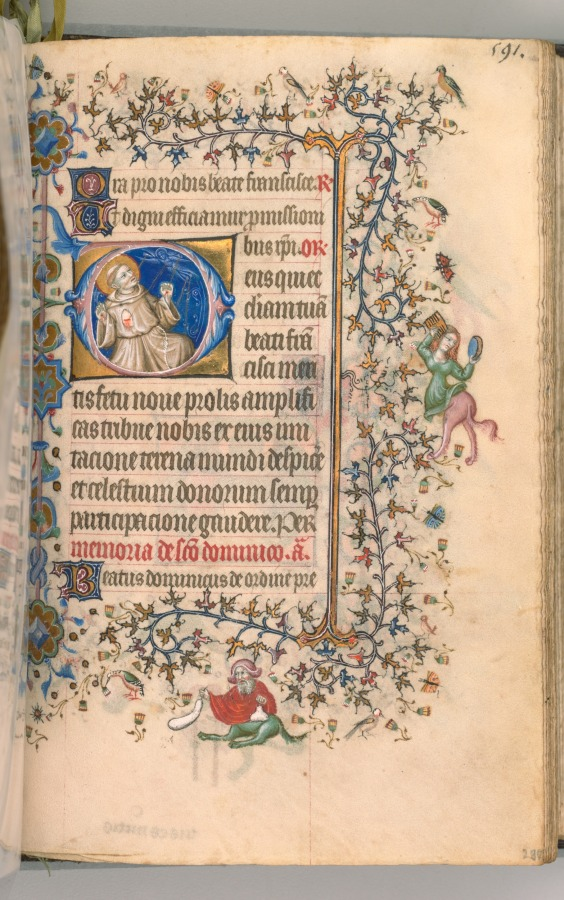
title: Hours of Charles the Noble, King of Navarre (1361-1425): fol. 290r, St. Francis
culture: France, Paris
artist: Master of the Brussels Initials and Associates (French)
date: c. 1405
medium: ink, tempera, and gold on vellum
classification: Bound Volume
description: This precious volume was obviously highly prized by its owner, the French-born King of Navarre, who had his coat of arms painted on no less than twenty folios. Rather than directly commissioning this manuscript from a specific workshop, it seems that Charles the Noble acquired his book of hours -- perhaps ready-made for the luxury market -- while on a trip to Paris in 1404-05. A collaborative effort, six painting styles are evidenced within the pages of this codex, those of two Italians, two Frenchmen, and two Netherlanders. The painter who was responsible for the planning and decoration of the book, and who produced seventeen of the large miniatures, was a Bolognese artist known as the Master of the Brussels Initials. His principal assistant, responsible for most of the borders, was a Florentine who signed his name "Zecho" da Firenze on folio 208 verso.